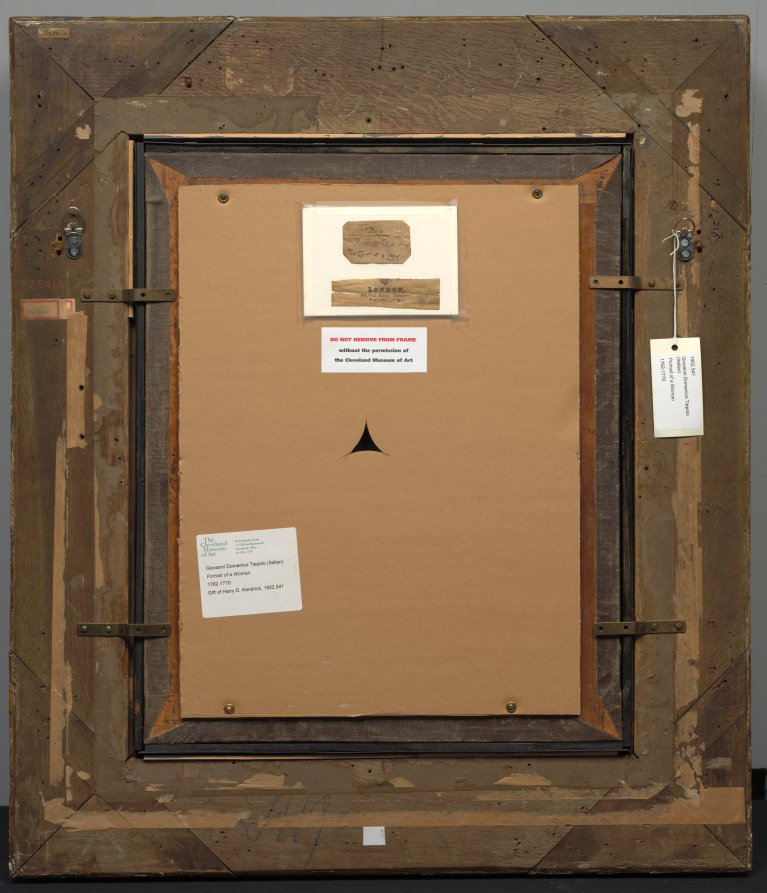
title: Portrait of a Woman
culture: Italy, 18th century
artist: Giovanni Domenico Tiepolo (Italian, 1727–1804)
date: 1762–1770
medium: oil on canvas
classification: Painting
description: This portrait was made in Spain, where the artist (the son of Giambattista Tiepolo, the great Venetian fresco painter) lived between 1762 and 1770.